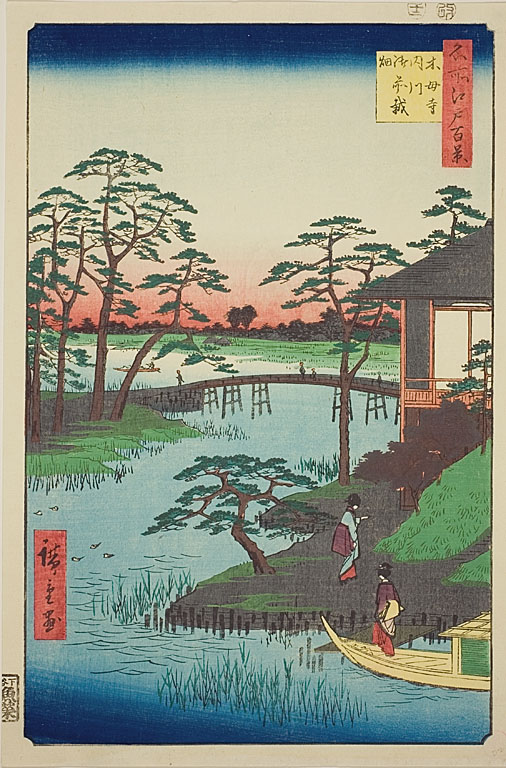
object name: Print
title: Mokubo Temple, Uchigawa Inlet, Gozensaihata (Mokuboji Uchigawa Gozensaihata), No.92 from the series "One Hundred Famous Views of Edo (Meisho Edo hyakkei)"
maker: Utagawa Hiroshige (Japanese, 1797-1858)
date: 1857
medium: Color woodblock print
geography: Japan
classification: woodblock print; print; asian art